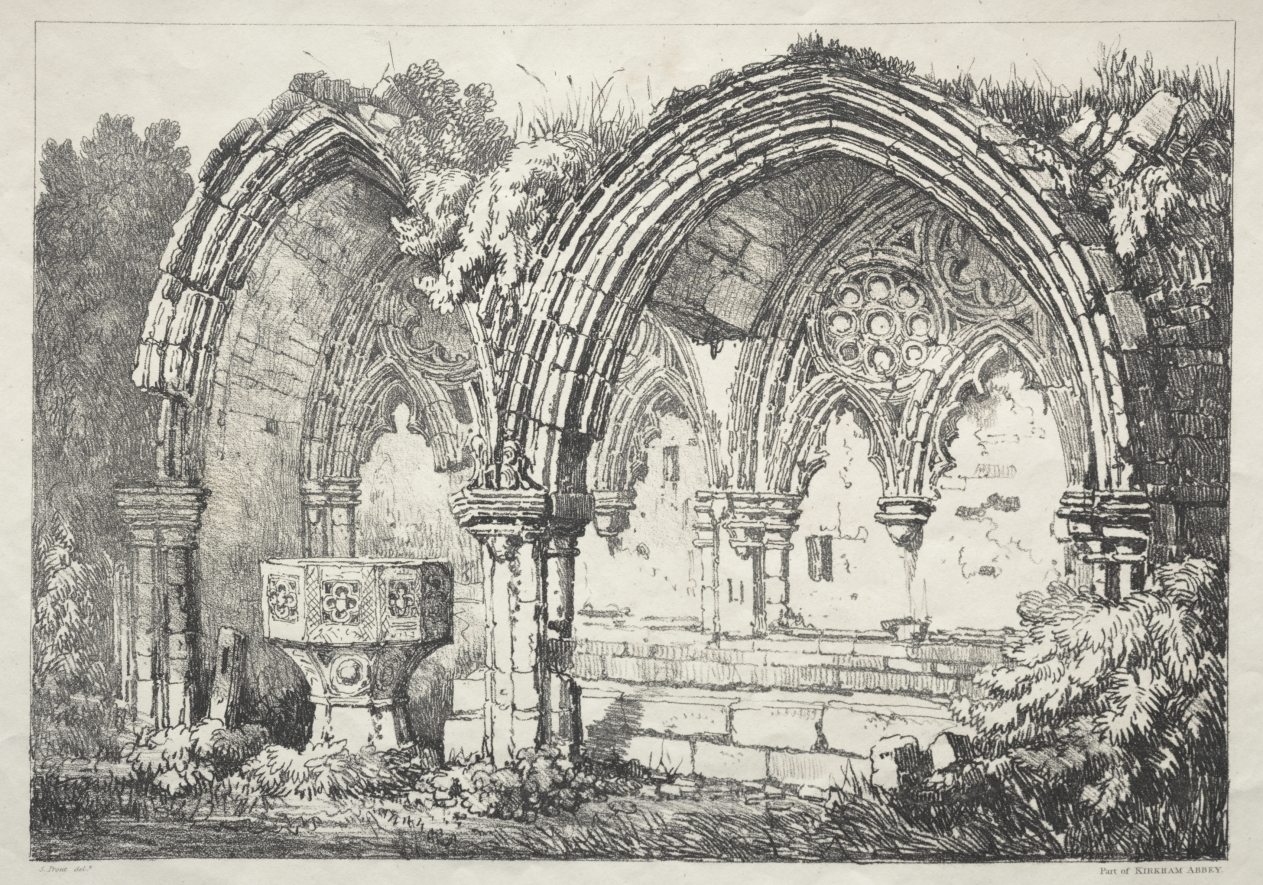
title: A Series of Ancient Buildings and Rural Cottages in the North of England: Part of Kirkham Abbey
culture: England, 19th century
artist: Samuel Prout (British, 1783–1852)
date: 1821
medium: softground etching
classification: Print